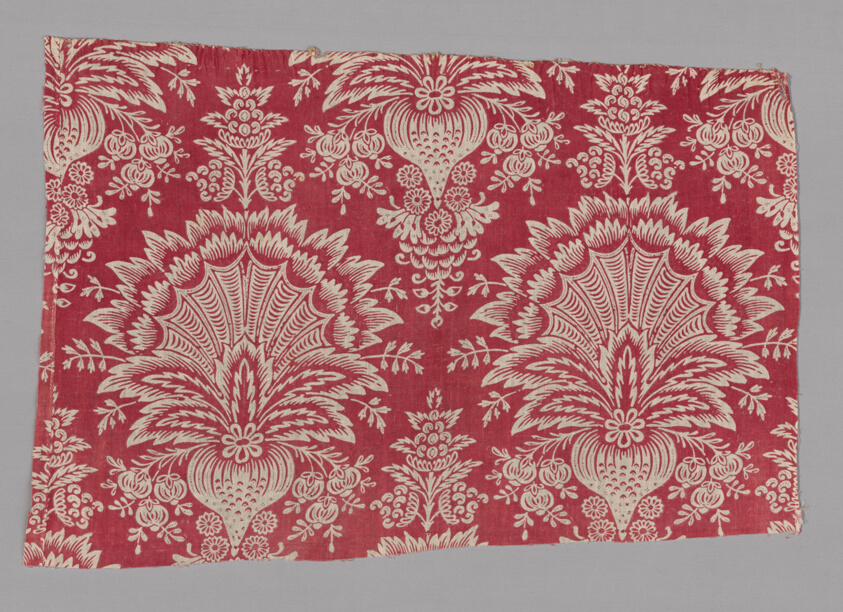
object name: Textile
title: Panel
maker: France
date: c. 1830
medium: Cotton, plain weave; block printed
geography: France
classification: textile; weaving - printed; printed textile